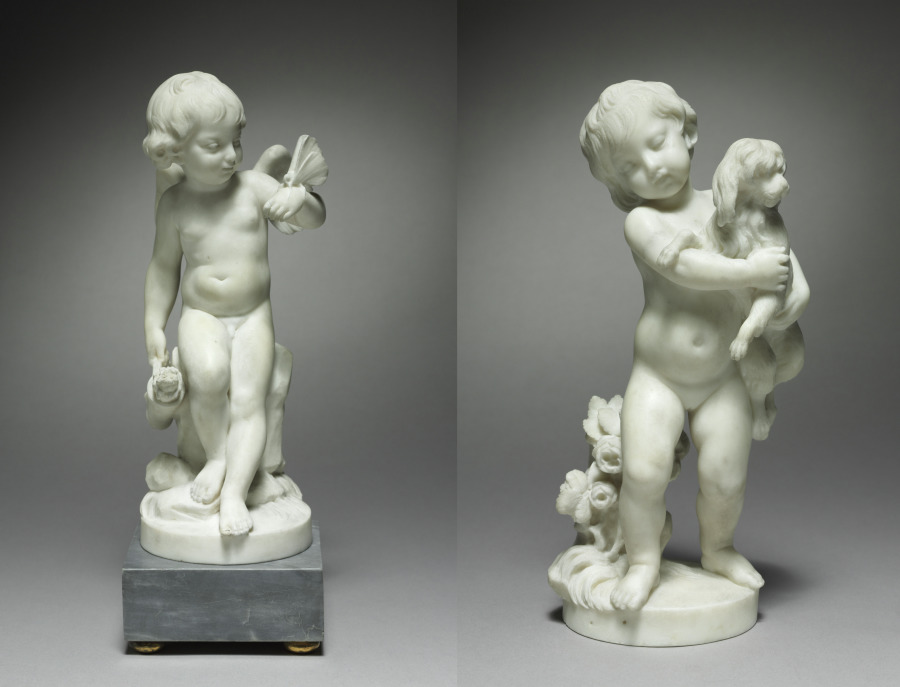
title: Pair of Marble Statuettes: Fickle Love and Faithful Love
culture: France, 19th century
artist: after Augustin Pajou (French, 1730–1809)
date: 1800s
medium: marble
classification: Sculpture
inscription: Signed Pajou f (fecit) 1787